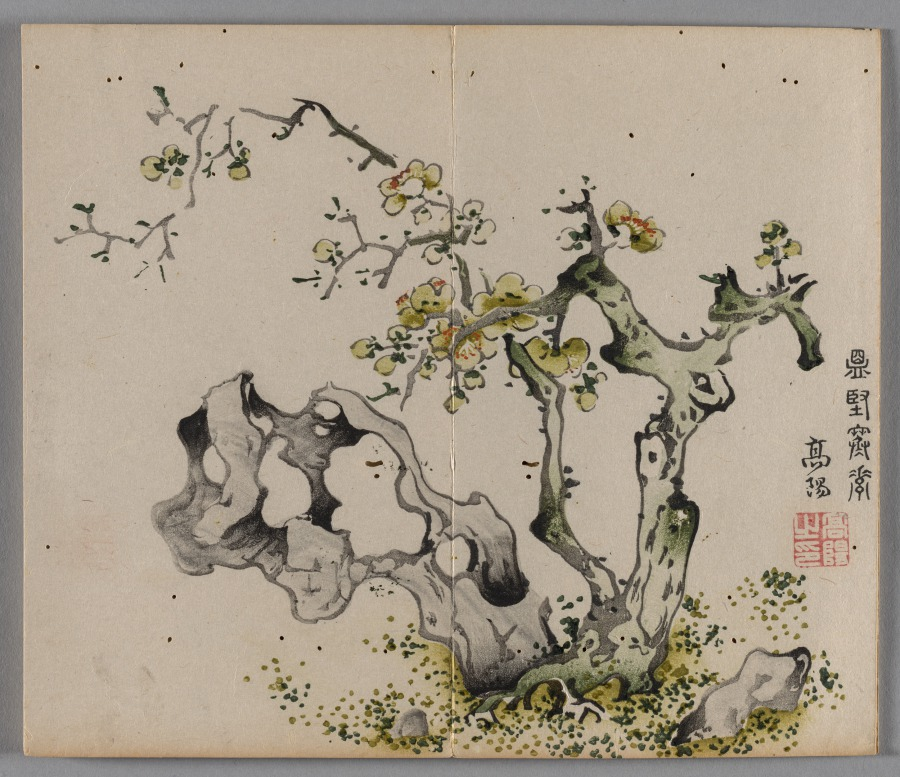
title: Ten Bamboo Studio Painting and Calligraphy Handbook (Shizhuzhai shuhua pu): Plum Blossoms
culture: China, Qing dynasty (1644-1911)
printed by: Hu Zhengyan (Chinese, c. 1584–1674)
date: 1633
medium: Woodblock-printed book; ink and colors on paper; first edition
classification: Print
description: Color printing reached a level of perfection in the early 1600s, as seen in this Ten Bamboo Studio Collection of Calligraphy and Painting and the Mustard Seed Garden Manual of Painting (printed 1679 and 1701). The painterly quality, precision in registering (aligning) the woodblocks, and harmonious colors made them the most successful color print editions in Chinese history. Both editions were printed and compiled in Nanjing, spread nationwide, and had a great impact on the arts in Japan and Korea.